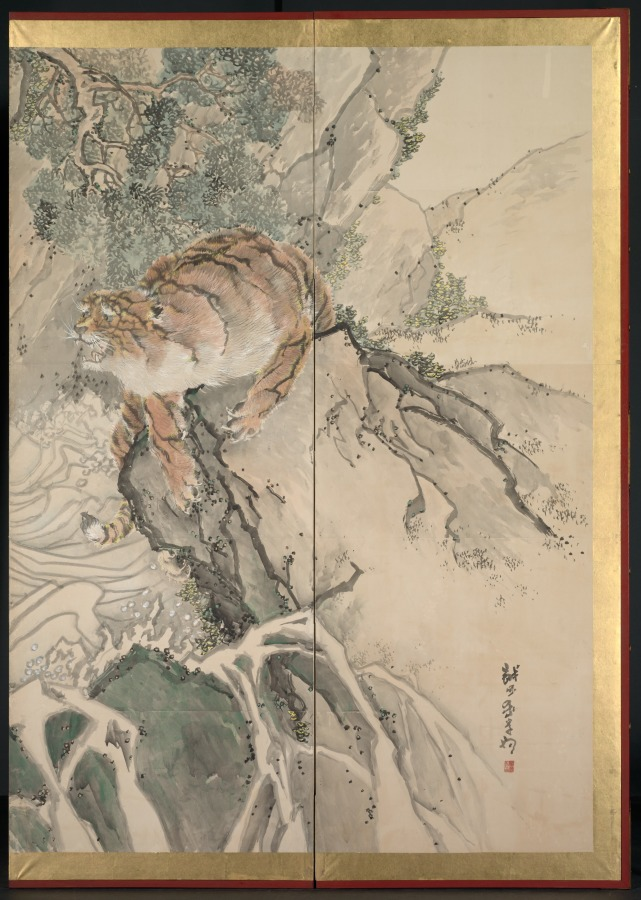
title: Tiger Family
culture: Japan, Edo period (1615–1868)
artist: Kishi Ganku (Japanese, 1749/56–1838)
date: early 1800s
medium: One of a pair of six-panel folding screens; ink and color on paper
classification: Painting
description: By the time this self-taught painter reached his thirties, his paintings were keenly sought after by Kyoto’s sophisticated patrons, including members of the imperial family. Judging from the surviving works, his supporters delighted in the colorful, auspicious imagery of Chinese historical figures, blossoming plum trees, cranes, peacocks, roosters, and especially tigers. Kishi Ganku was originally from the coastal town of Kanazawa, but relocated to Kyoto to work for the Arisugawa family. His work incorporates stylistic elements from the Kano school, the Maruyama school, and works by the Chinese artist Shen Nanping (1682–1760).